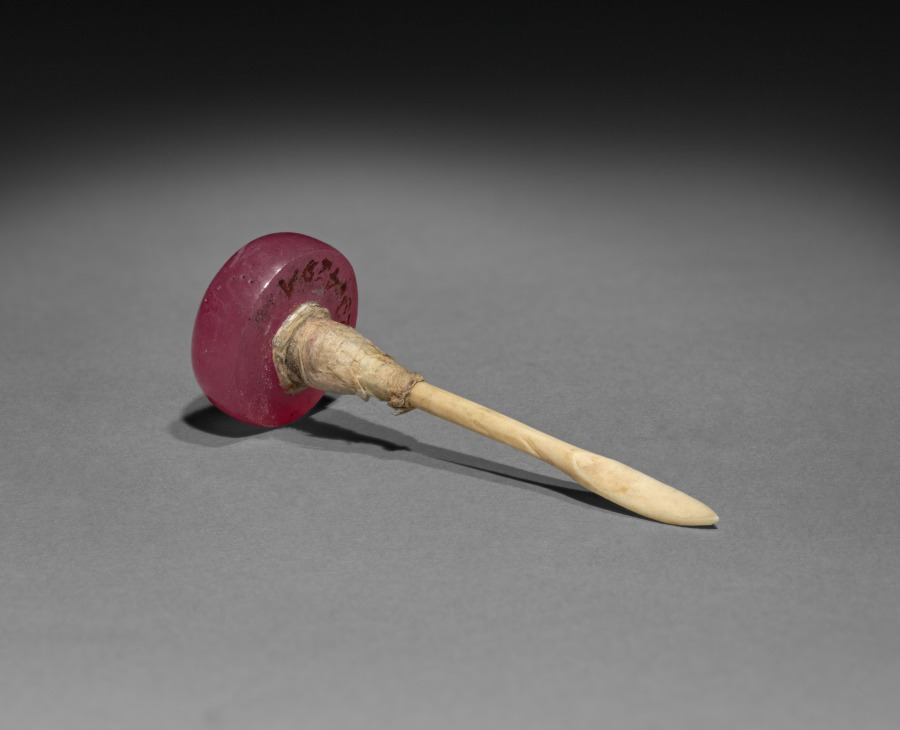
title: Snuff Bottle (stopper)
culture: China, Qing dynasty (1644-1911)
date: 1644–1911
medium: glass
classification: Glass